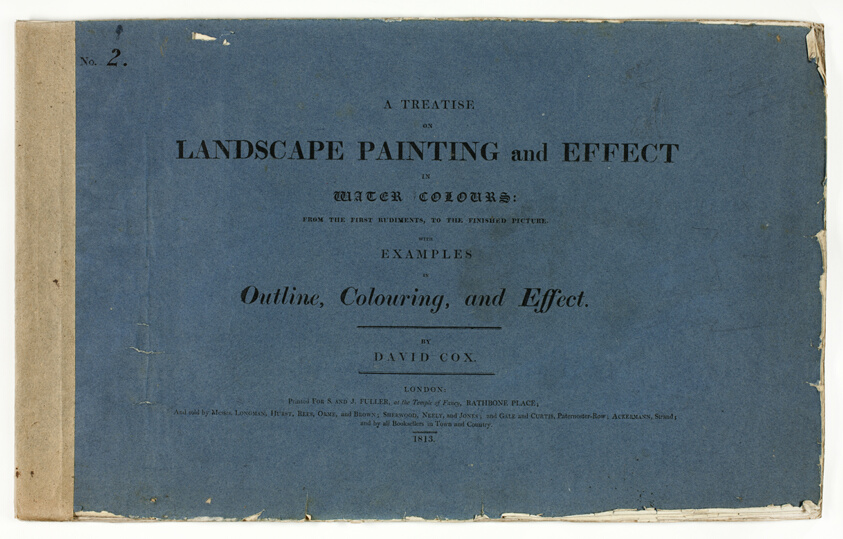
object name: Book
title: A Treatise on Landscape Painting and Effect in Water Colours: From the First Rudiments, to the Finished Picture No. 2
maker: David Cox, the elder (English, 1783-1859); published by S. and J. Fuller (English, 19th century)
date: 1813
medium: Book with six etchings and letterpress in black on cream wove paper, in box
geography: England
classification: book; paper; prints and drawing